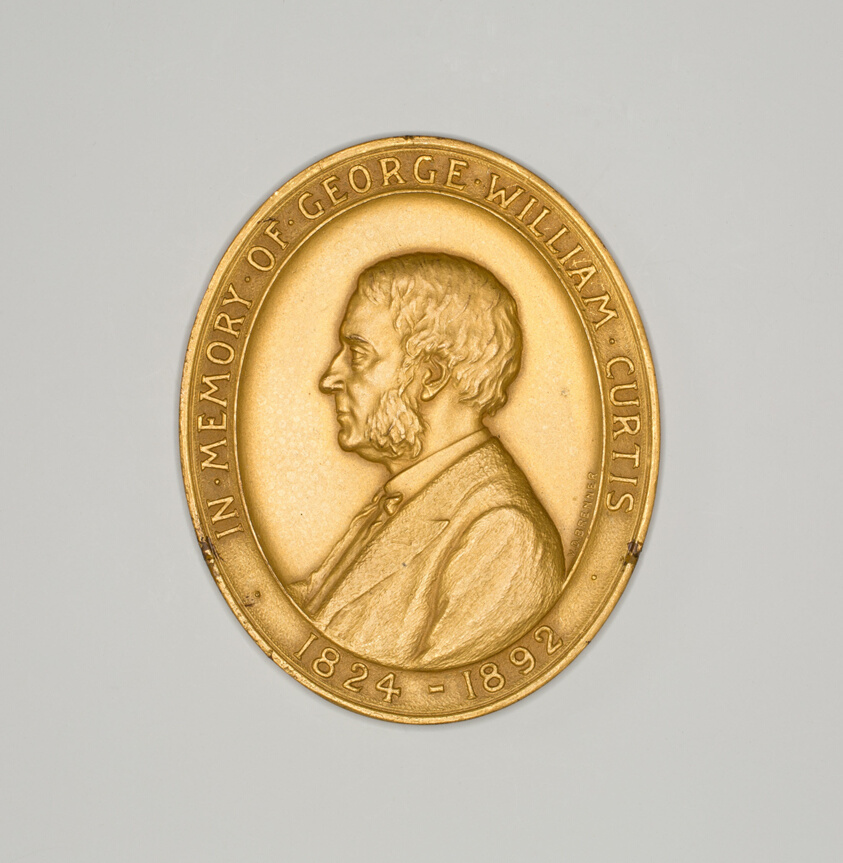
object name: Metalwork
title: Medal Depicting George William Curtis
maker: Victor David Brenner (American, born Šiauliai, Russian Empire, now Lithuania, 1871–1924)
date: 1892–1908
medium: Silver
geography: United States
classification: medal; american arts; decorative arts